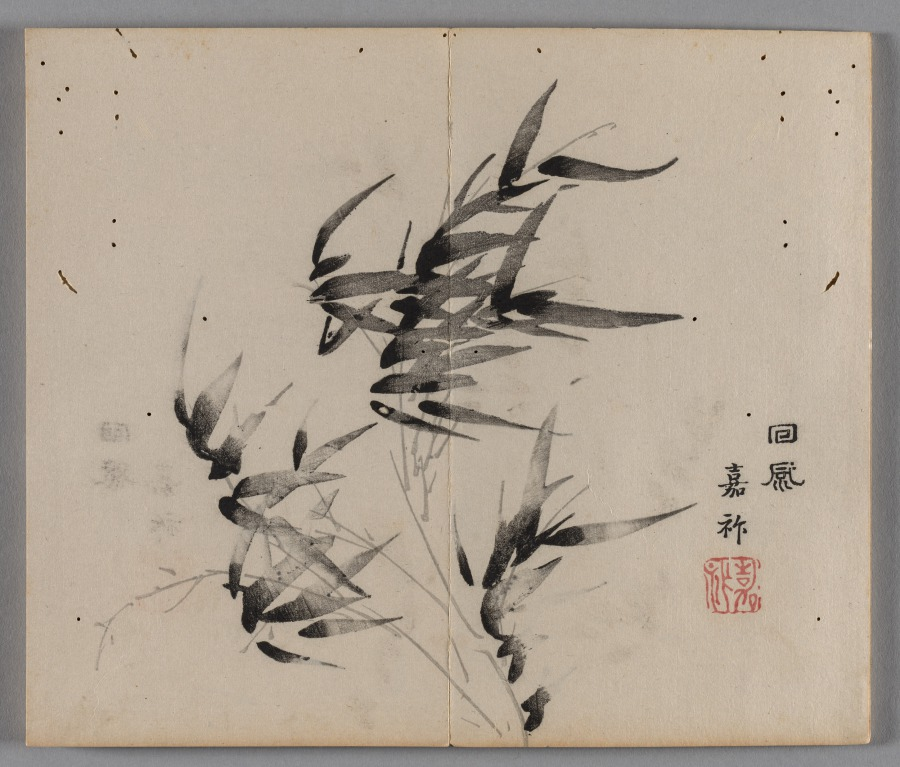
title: Ten Bamboo Studio Painting and Calligraphy Handbook (Shizhuzhai shuhua pu): Bamboo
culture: China, Qing dynasty (1644-1911)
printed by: Hu Zhengyan (Chinese, c. 1584–1674)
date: 1633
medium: Woodblock-printed book; ink and colors on paper; first edition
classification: Print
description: Color printing reached a level of perfection in the early 1600s, as seen in this Ten Bamboo Studio Collection of Calligraphy and Painting and the Mustard Seed Garden Manual of Painting (printed 1679 and 1701). The painterly quality, precision in registering (aligning) the woodblocks, and harmonious colors made them the most successful color print editions in Chinese history. Both editions were printed and compiled in Nanjing, spread nationwide, and had a great impact on the arts in Japan and Korea.